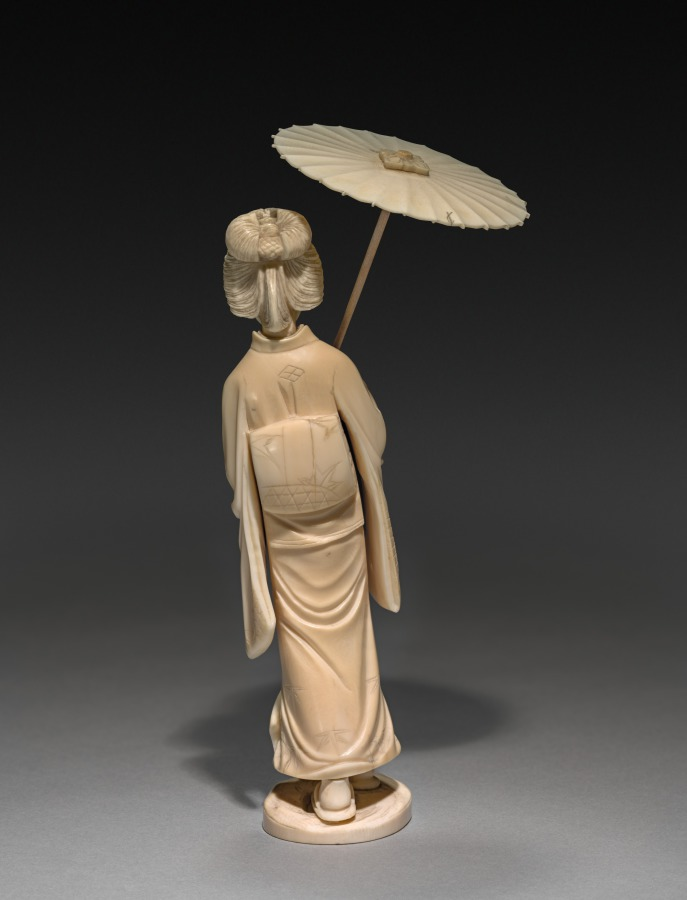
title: Woman Carrying a Parasol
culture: Japan, Meiji period (1868–1912)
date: Late 1800s- Early 1900s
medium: ivory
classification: Ivory